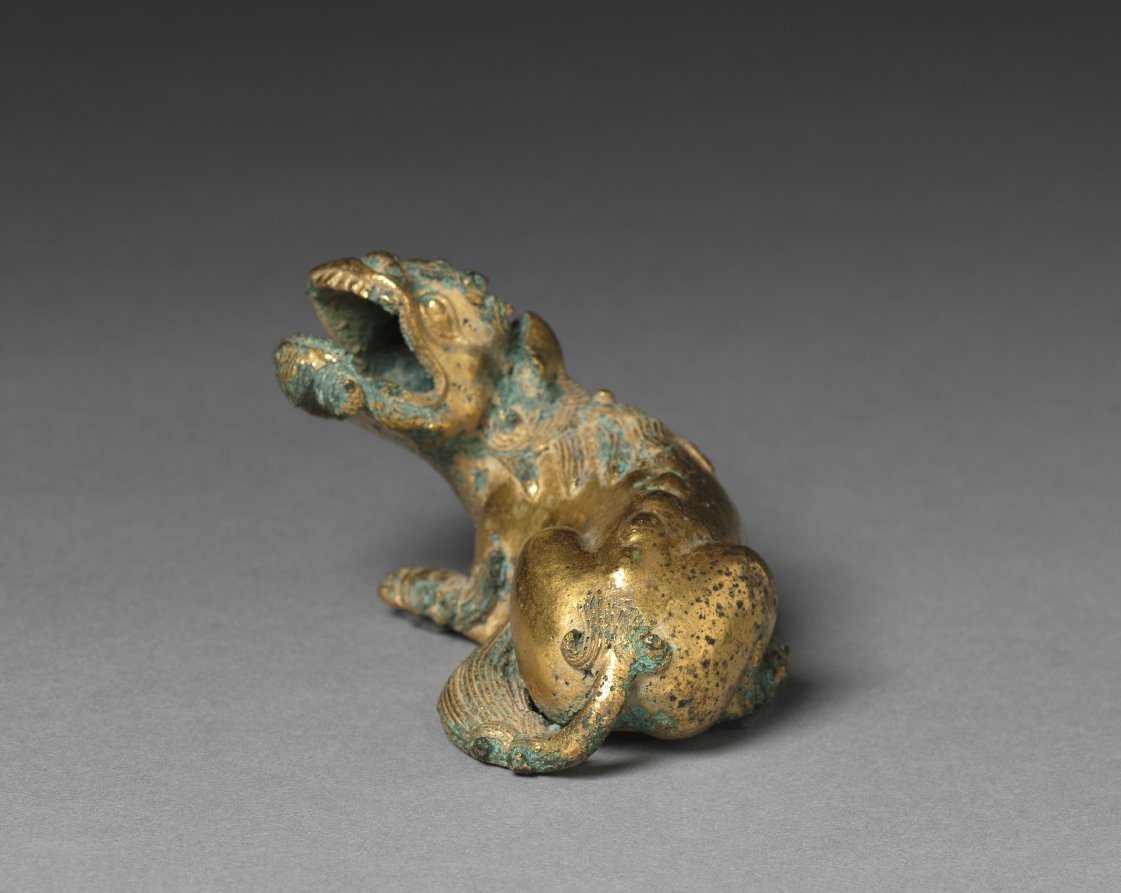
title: Dog-shaped Paperweight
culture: Korea, Unified Silla period (676-935)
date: 676–935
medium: gilt bronze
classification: Sculpture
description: This small object in the shape of a hybrid dog-lion is believed to have been used as a paperweight. Since the Three Kingdoms period (57 BC−668), mercury amalgam gilding had been widely employed to embellish metal objects as well as to make their surface resistant to acids. This technique involves mixing pure gold powder with liquid mercury to form a paste-like mixture. As heat is applied, the mercury evaporates, but an opaque layer of gold remains on the surface. This coating must be polished by first rubbing it with dried rice seedlings, then processing it in ash lye to eliminate impurities; next, the piece is washed and rinsed in a plum vinegar bath.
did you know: This is a dog and lion hybrid.